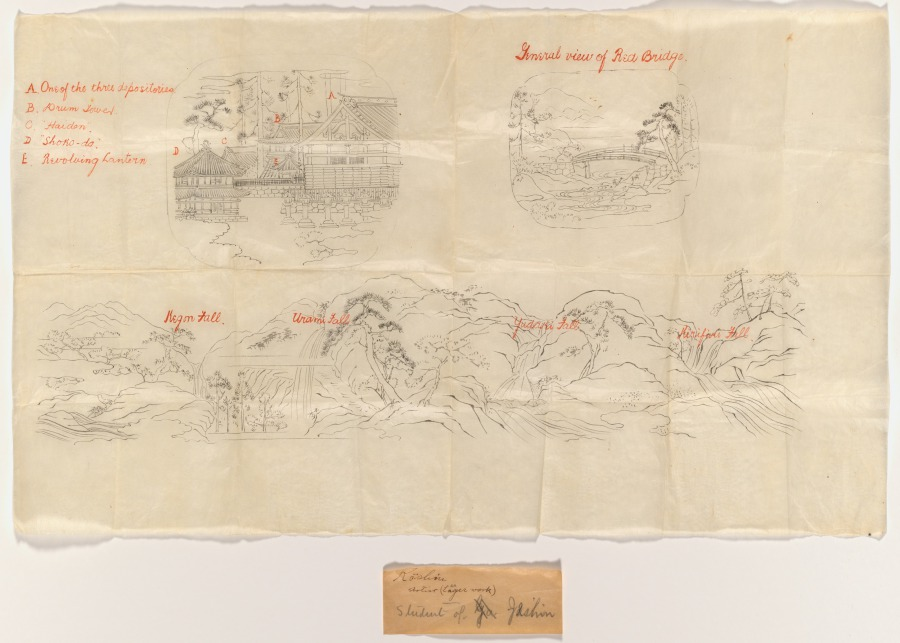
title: Covered Box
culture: Japan, Meiji period (1868–1912)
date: late 1800s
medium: wood with lacquer and gold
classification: Lacquer